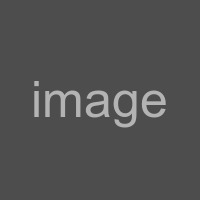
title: Group Taken at Nortekande Bungalow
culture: India, 19th century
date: c. 1880s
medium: albumen print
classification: Photograph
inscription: Written in pencil on verso: “Group taken at Nortekande Bungalow”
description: Colonial life offered amusements. Here, a group enjoying a leisurely afternoon poses in front of a rustic bungalow. The skull with horns inside is a trophy from the hunt. The woman’s laced up vest, along with the name in the title, suggest that this group may contain Austrian, German, or Scandinavian members rather than just the British.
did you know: The quality of the photograph and the careful arrangement of the group suggest this may have been taken by a professional photographer.